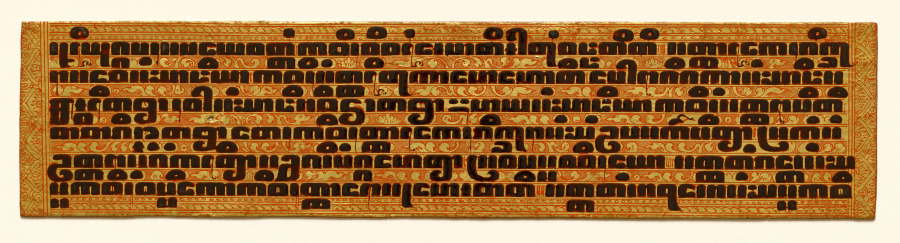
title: Text, folio 9 (recto) from a Kammavacha: Buddhist ordination text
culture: Myanmar (Burma)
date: 1800s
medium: Leaf: lacquer and gilding on cloth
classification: Manuscript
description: In premodern Burma, lay people commissioned lavishly ornamented manuscripts for ceremonial occasions, when officiants would read aloud from the text. Written in black lacquer, the text is in the language of Pali written in a Burmese script. It contains ordination rites and procedures for monastic ceremonies. The second to last page is covered with intricately drawn, winged celestial beings (nats) in gestures of praise. They fly amid intertwining vegetation—denoting bounty—that grows from serpentine forms that refer to rain clouds. Lionlike forms inhabit the space with them. The top and bottom covers are equally ornamented with jeweled floral patterning.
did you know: The Pali text of this manuscript is written in Burmese square script, which is also known as "tamarind seed script."